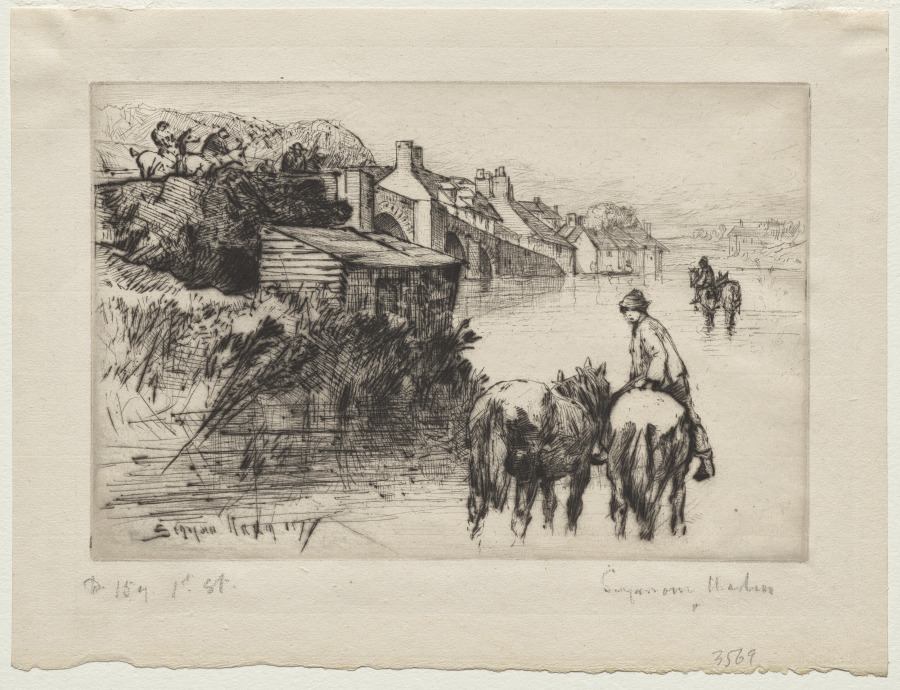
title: Wareham Bridge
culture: England, 19th century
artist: Francis Seymour Haden (British, 1818–1910)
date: 1877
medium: drypoint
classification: Print